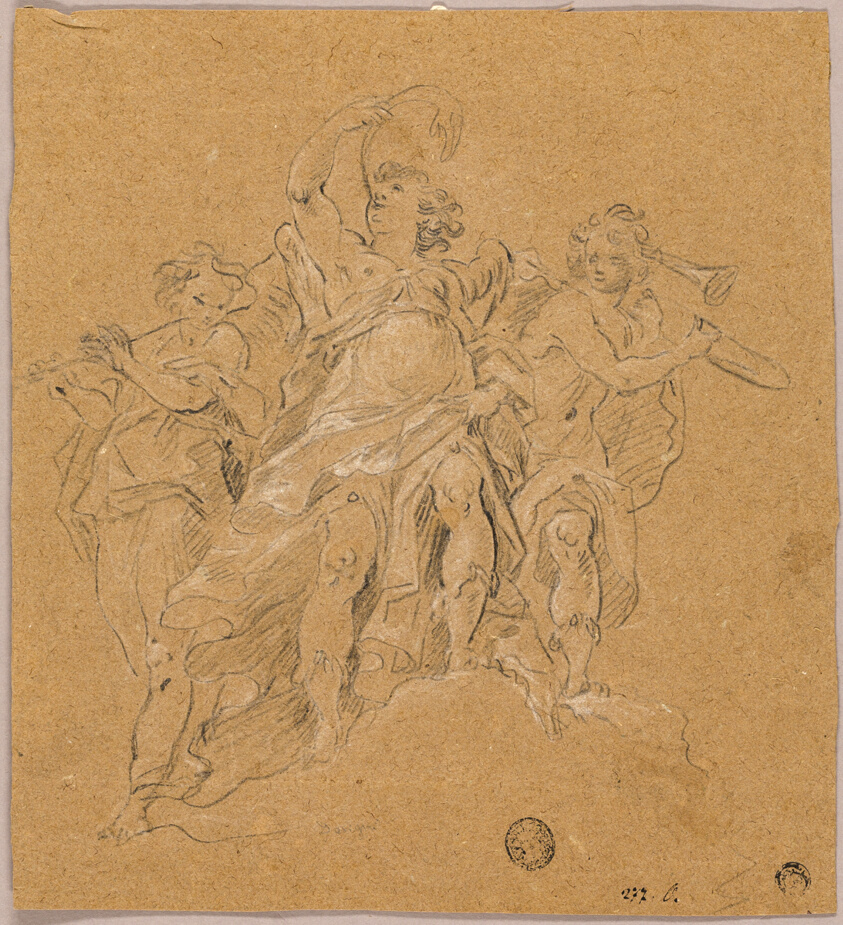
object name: Drawing and Watercolor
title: Angel Musicians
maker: Follower of Francesco Monti (Italian, 1646-1712); or the School of Parmigianino (Italian, 1503-1540)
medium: Graphite, heightened with white chalk, on reddish- brown laid paper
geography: Italy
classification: chalk; drawings (visual works); prints and drawing